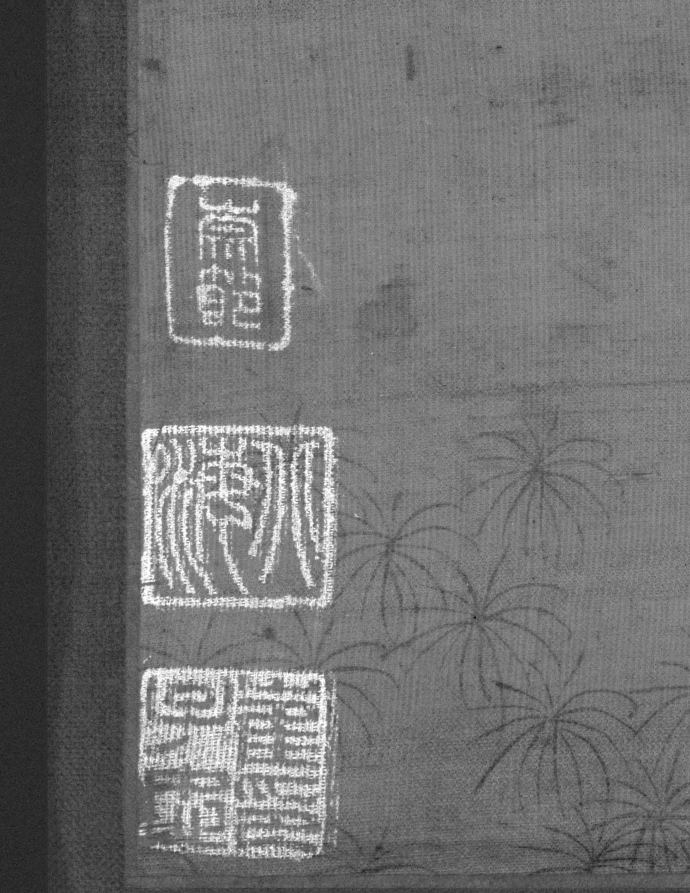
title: Xu Jingyang Moving His Family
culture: China, Ming dynasty (1368–1644)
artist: Cui Zizhong (Chinese, 1574–1644)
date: 1644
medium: Hanging scroll; ink and color on silk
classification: Painting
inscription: Artist's 2 seals: Pei-hai, Cui Zizhong yin.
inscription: 9 additional seals: 2 of Xiang Yuan (18th-19th c.); 1 of Tang Zuomei (late 18th-19th c.); 1 of Zhang Heng 張珩 (1915-1963); 1 of C. C. Wang 王季遷 (1907–2003); 4 unidentified.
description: Xu Jingyang was a dedicated fourth-century Confucian official who allegedly turned into a Daoist immortal. This scroll depicts the legend that when he attained immortality, he took his entire household, including chickens and dogs, to paradise. Cui Zizhong’s painting style intentionally referenced ancient masters. Typical of the pre-Song dynasty landscape tradition, there is the use of blue and green colors and an emphasis on outline rather than texture. While the trembling outlines are reminiscent of earlier painters, the flickering light on rocks and trees is a stylistic feature of Cui’s own time.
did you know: Xu Jingyang, wearing red, is in the upper register of figures, while below his servants transport a rooster, dog, and other supplies.